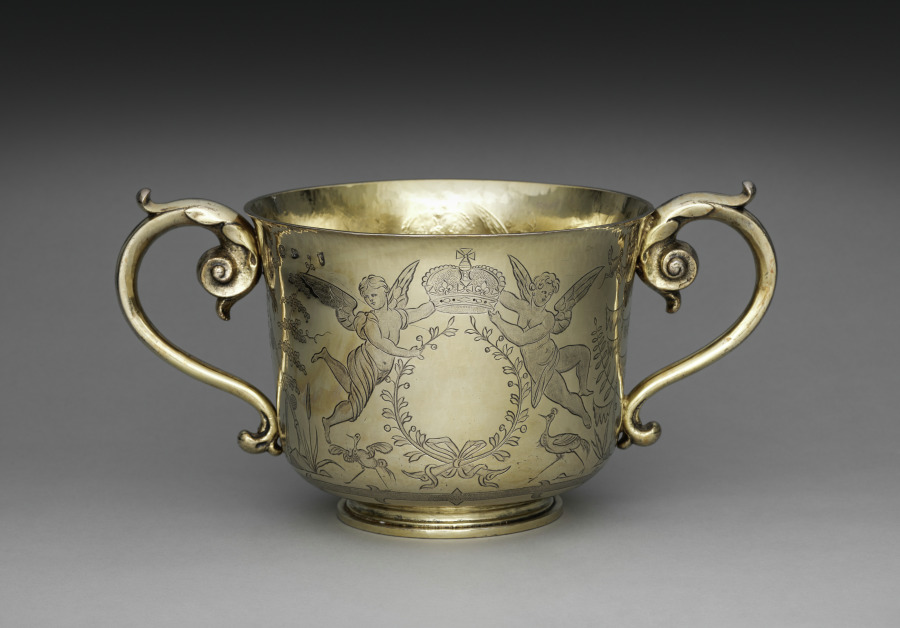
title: Two-Handled Cup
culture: England, London, 17th century (James II)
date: 1686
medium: silver gilt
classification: Silver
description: Produced a year after the coronation of James II (1633–1701), this silver cup and the accompanying lid celebrate the monarchy and reflect the political and social alliances that underpinned the aristocracy during the 1600s. During their coronation, James II and his second wife Mary of Modena (1658–1718) were carried through the city of London under a silk canopy adorned with motifs inspired by European perceptions of Chinese art, known as chinoiserie. Following the procession, the thirty-two lords involved in the ceremony were each offered a portion of the cloth from the canopy as well as sixteen troy ounces of silver from the posts. At least two of them commissioned cups adorned with chinoiserie to be made from the silver. While it is unclear if this cup once belonged to one of the thirty-two peers, it was almost certainly created in response to the same motifs and social developments.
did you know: This two-handled cup is accompanied by a lid. See cover record.